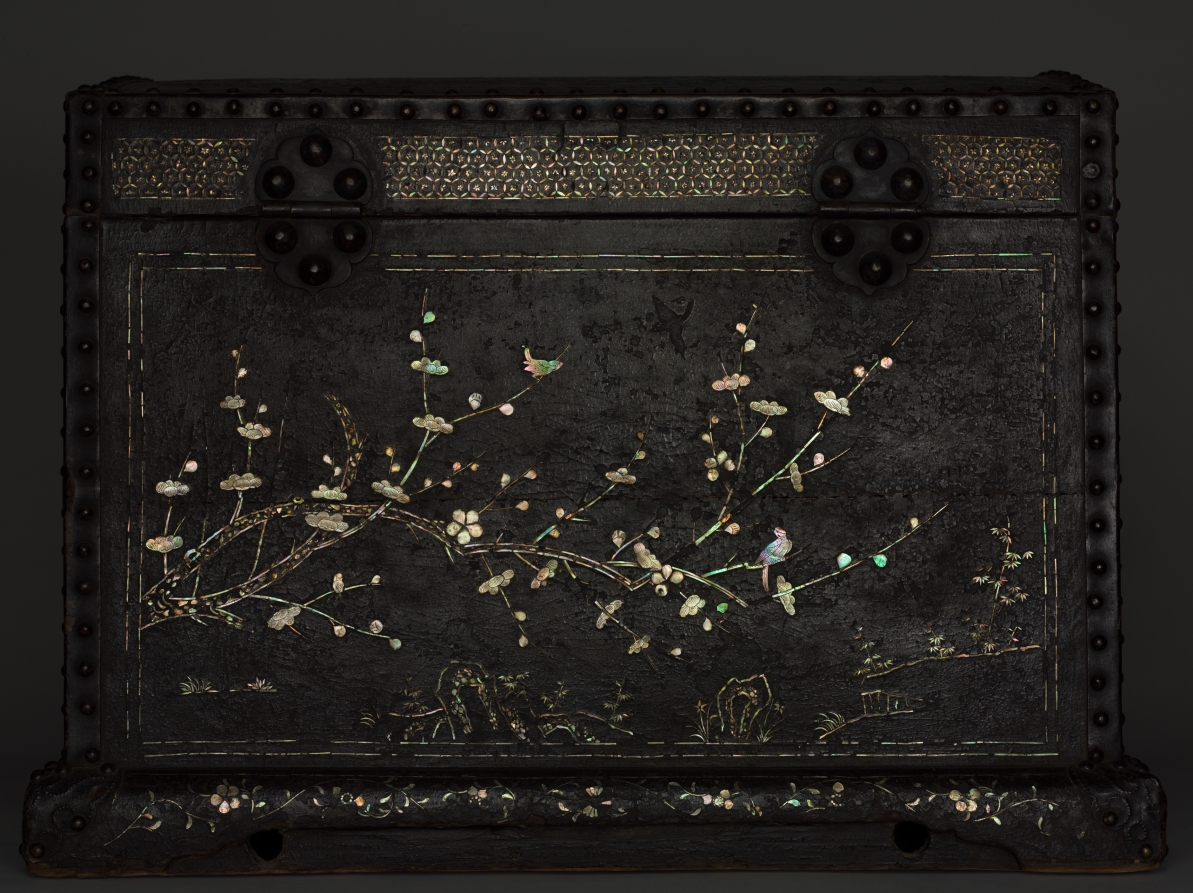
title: Chest for Storing Garments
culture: China, Ming dynasty (1368–1644)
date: 1400s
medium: lacquered wood with mother-of-pearl inlay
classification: Lacquer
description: This precious lacquer box is decorated with bird and plant motifs and figures in mother-of-pearl inlay. The decoration depicts the leisurely pursuit of scholars in nature and a garden setting. Scholars play the board game weiqi, have philosophical conversations, pluck a qin (a zither-like instrument with strings), and read books. Lacquer chests of this type were used to store garments neatly folded along their straight seams. The mother-of-pearl inlay from shells is a technique that was typically practiced by craftsmen in Hangzhou and other parts of southeast China near the sea.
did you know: Lacquer chests of this type were used to store garments.